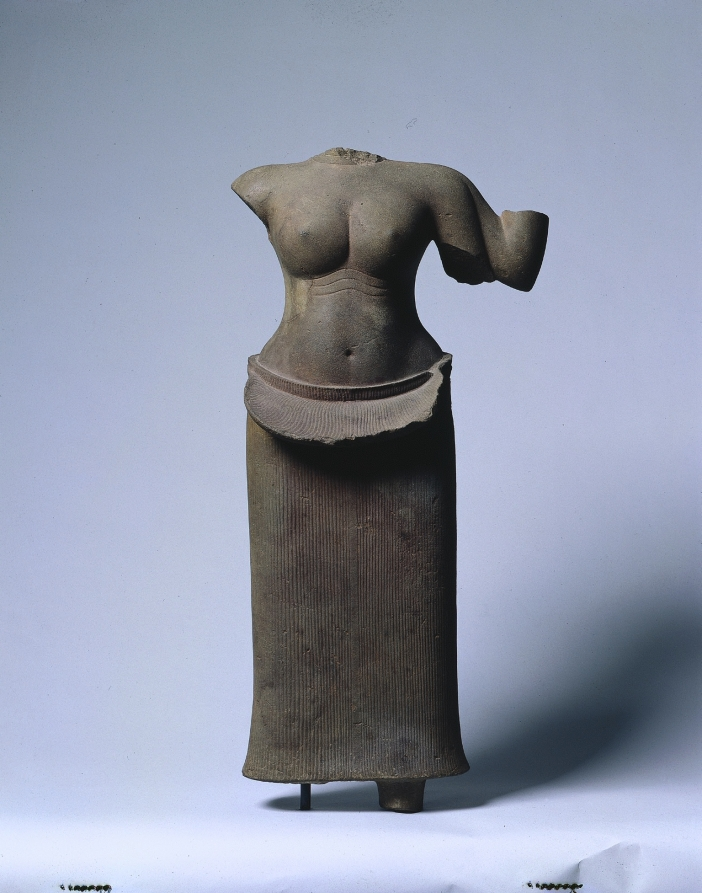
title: Standing Female Deity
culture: Cambodia, Angkor, Bakheng, 10th century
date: 900s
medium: stone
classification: Sculpture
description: This four-armed deity wears a sarong skirt, with its pleated end folded over the belt, as was the fashionable Bakheng style during this period. The incised lines beneath the breasts indicated folds of flesh as marks of beauty. This figure relates to the sculptures of the Phnom Bakheng, a temple dedicated to Shiva.